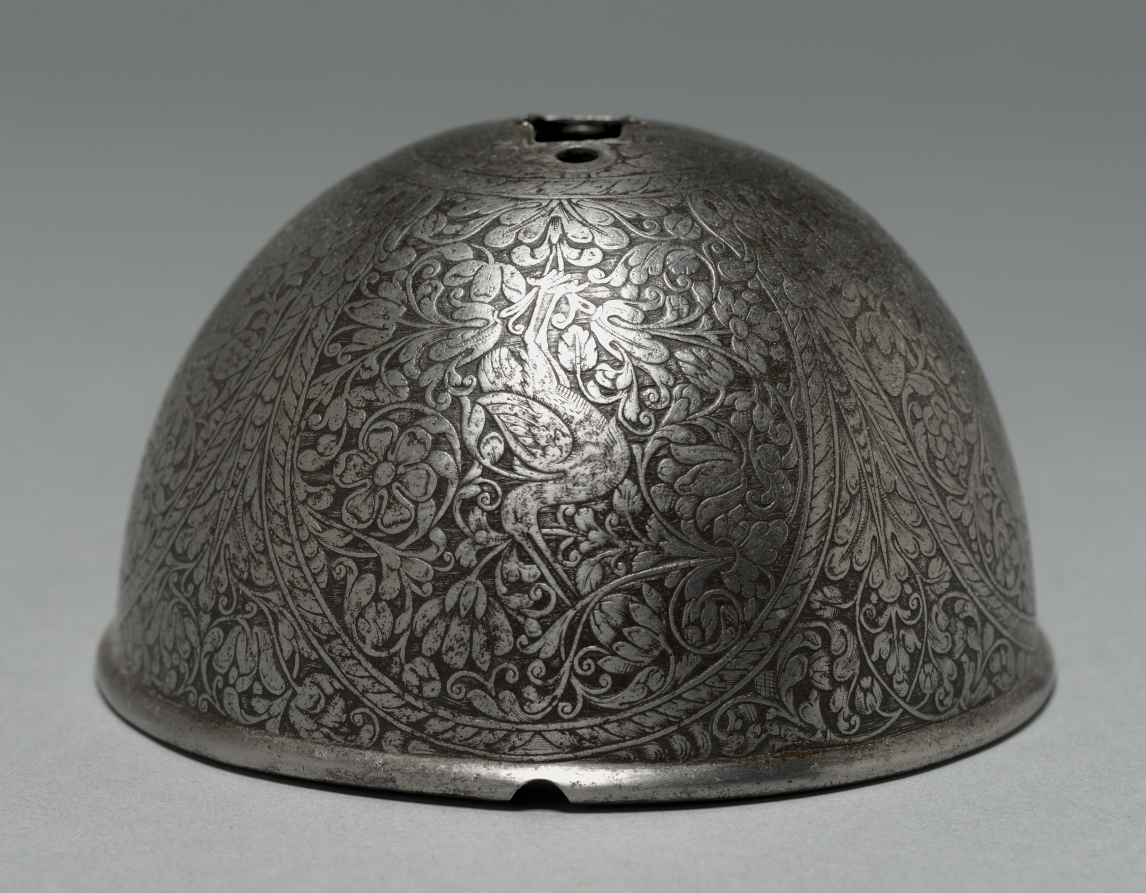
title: Cup from a Rapier's Hilt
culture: Italy, 17th century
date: c. 1650–75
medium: steel with etched floral, floiate, and bird designs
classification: Arms and Armor